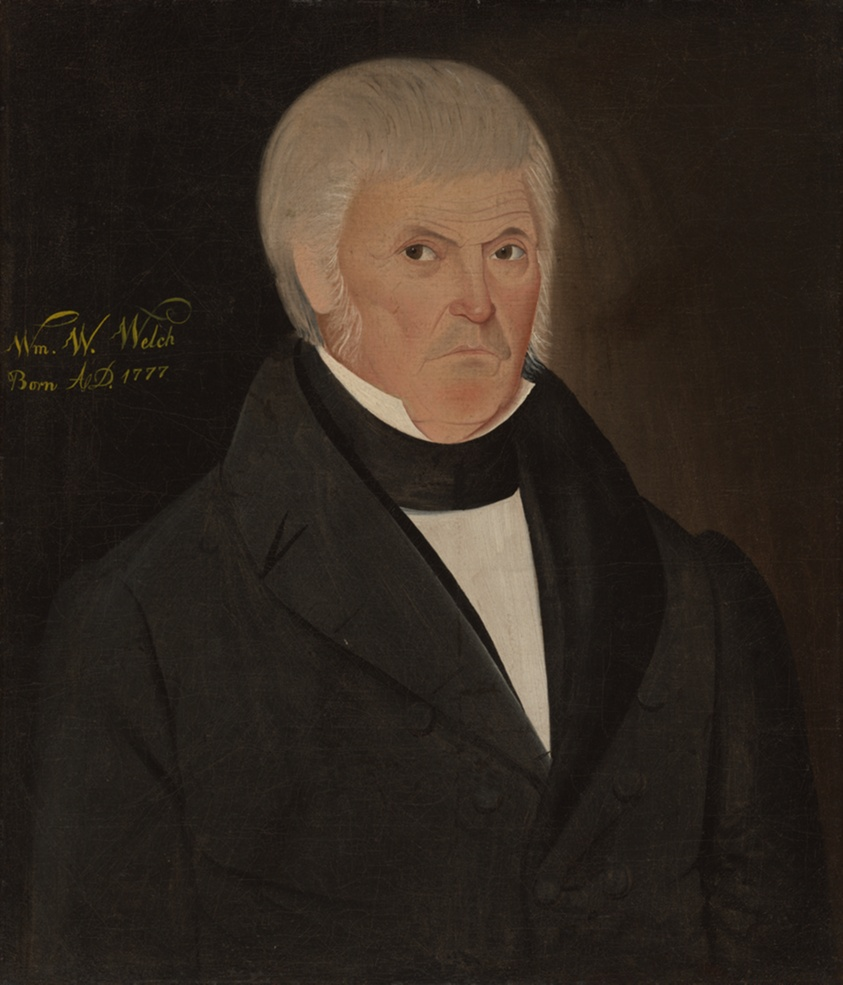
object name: Painting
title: William W. Welch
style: Folk Art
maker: Sheldon Peck (American, 1797–1868)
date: c. 1837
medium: Oil on canvas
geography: United States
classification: painting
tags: people, portraits